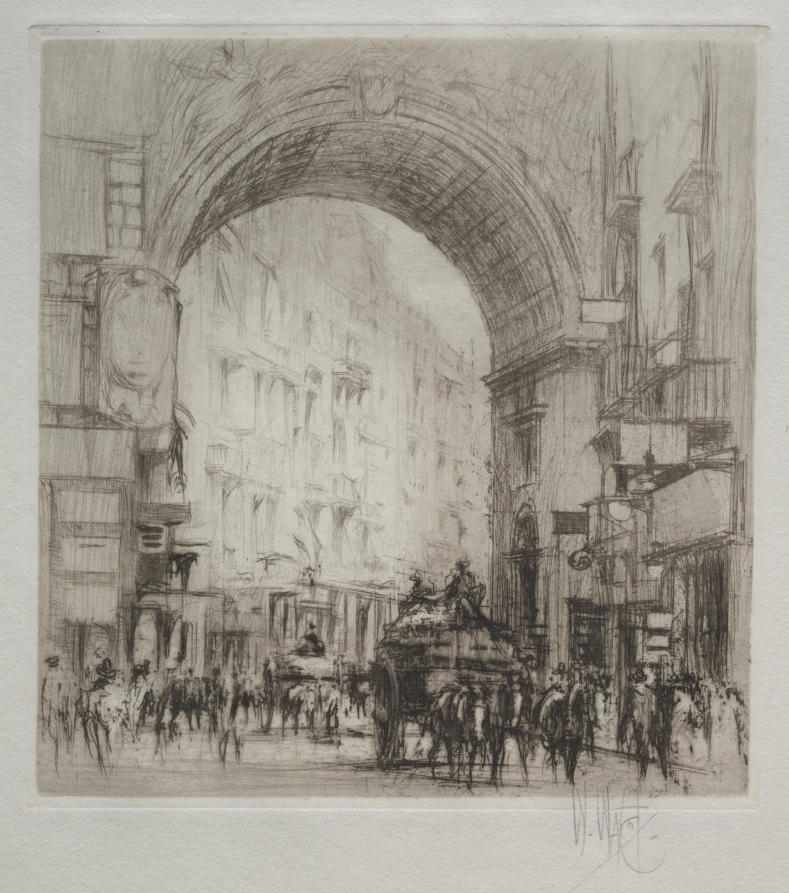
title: Arco San Carlo, Naples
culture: England, 20th century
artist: William Walcot (British, 1874–1943)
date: 1921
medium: etching and drypoint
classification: Print